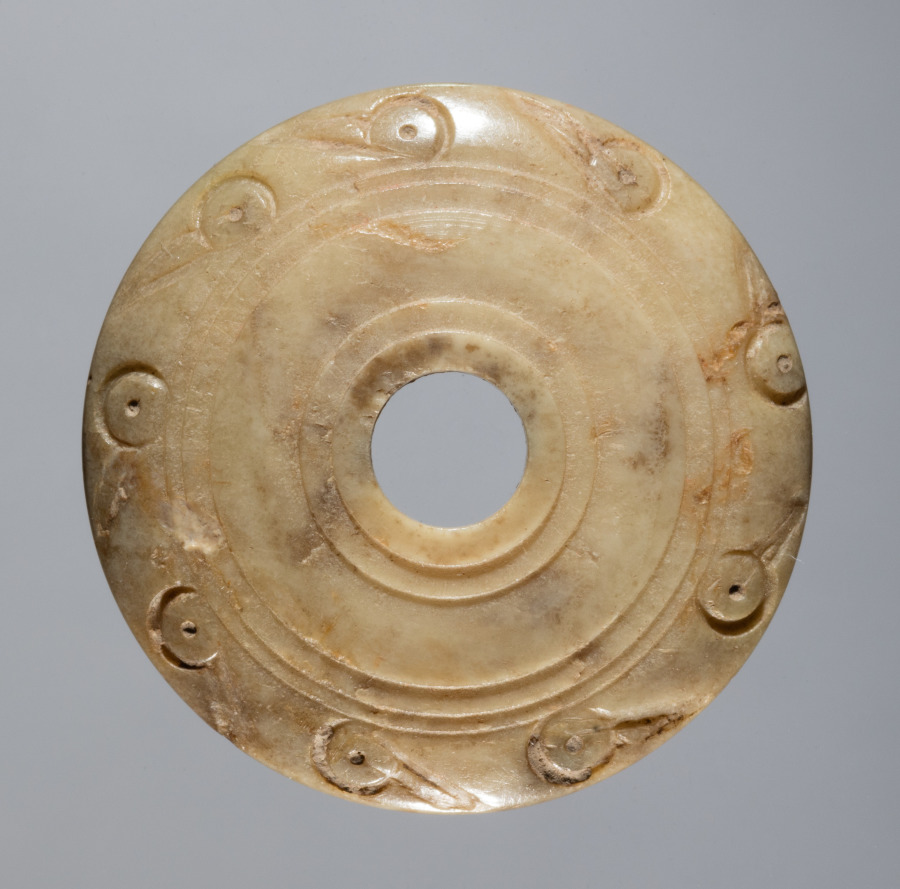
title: Spindle Whorl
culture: Iran, early Islamic period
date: 700s - 900s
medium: bone, incised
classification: Spindle Whorl